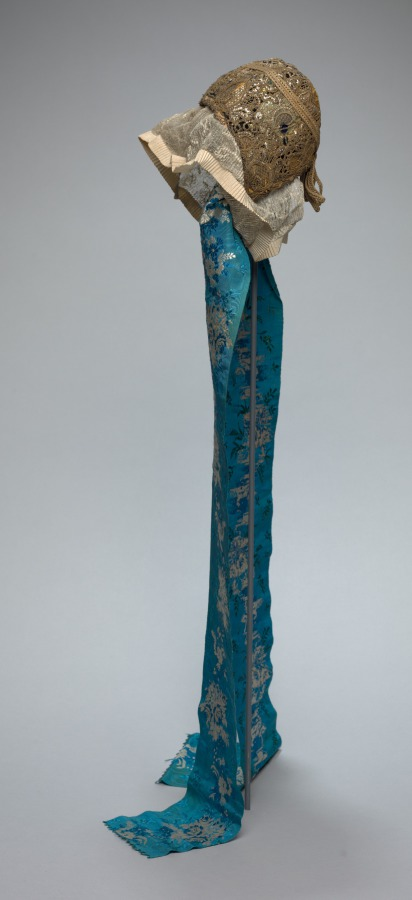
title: Headdress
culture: Germany, Buckeburg, 18th century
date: 1700s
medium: embroidery, gold thread; decorated with gold lace and streamers of moiré ribbon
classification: Garment